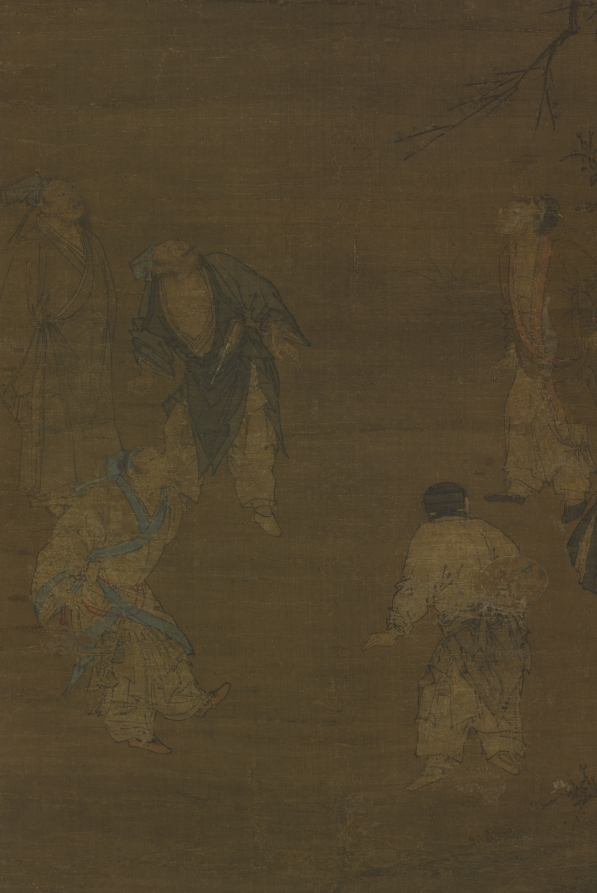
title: The Football Players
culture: China, Southern Song dynasty (1127-1279)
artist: attributed to Ma Yuan (Chinese, c. 1150–after 1255)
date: c. late 1100s–1st quarter 1200s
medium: Hanging scroll; ink and light color on silk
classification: Painting